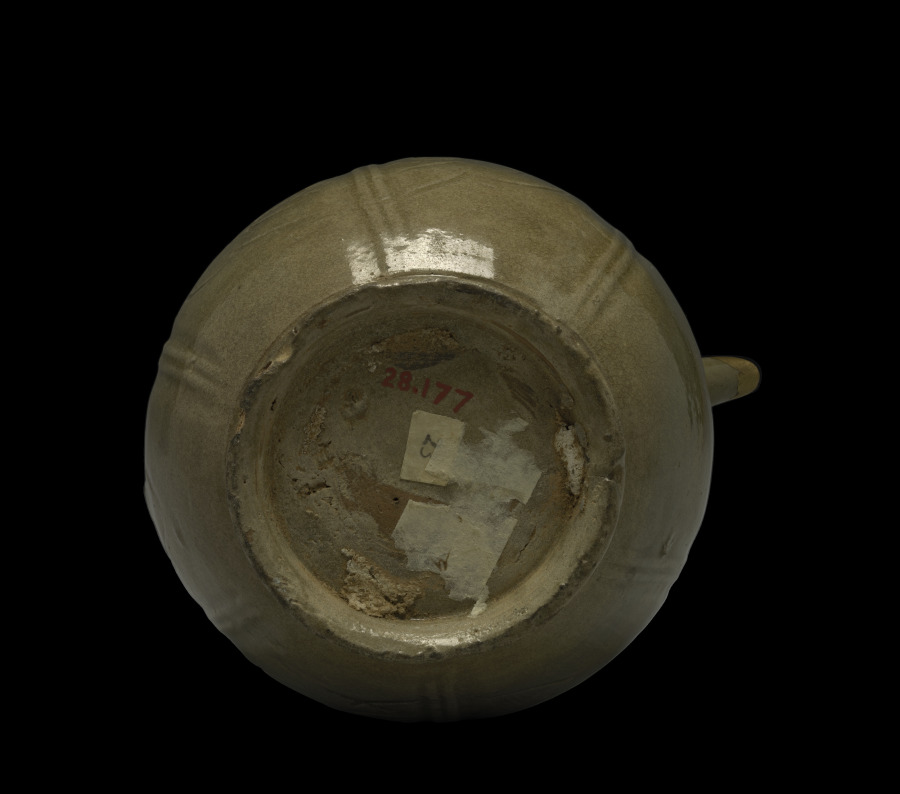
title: Wine Jug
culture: China, Zhejiang province, Shang-lin-hu type, Five dynasties (907–960) to Song dynasty (960–1279)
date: 900s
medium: glazed gray stoneware, Yue ware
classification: Ceramic